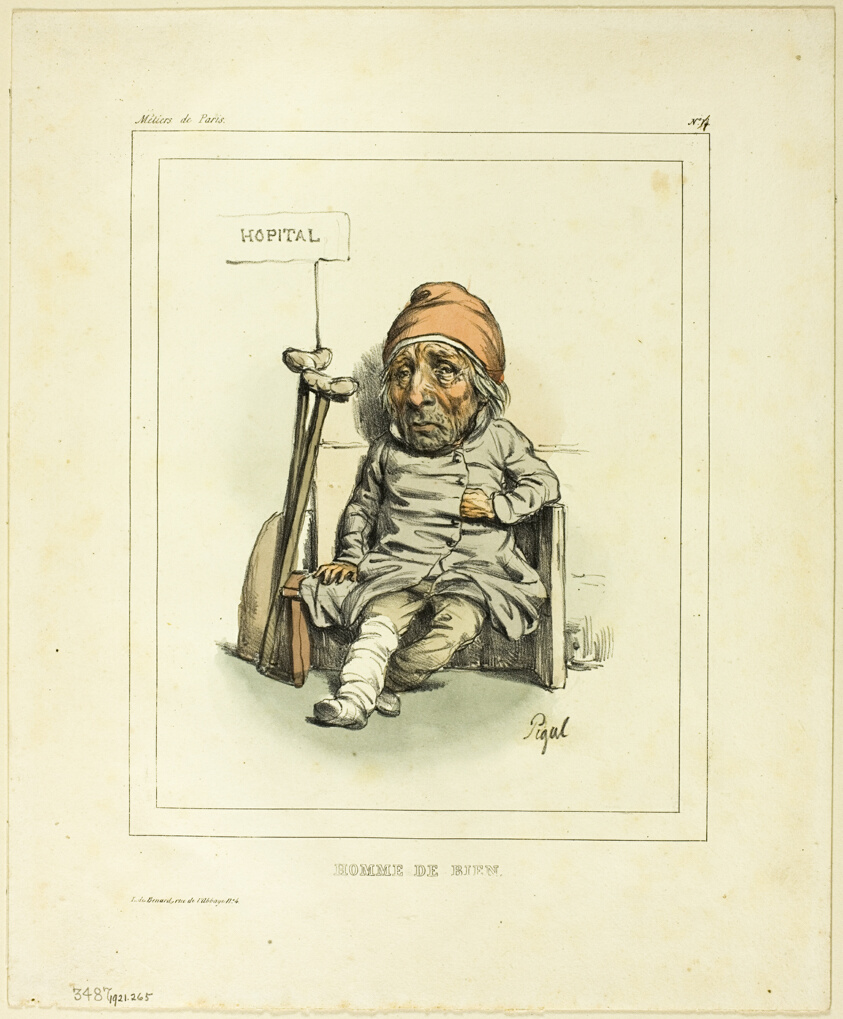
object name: Print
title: Good Man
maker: Edmé Jean Pigal (French, 1798-1872); published by chez Aubert (French, 19th century); printed by Bénard (French, 19th century)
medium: Lithograph, with hand-coloring, on ivory wove paper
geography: France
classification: lithograph; print; prints and drawing